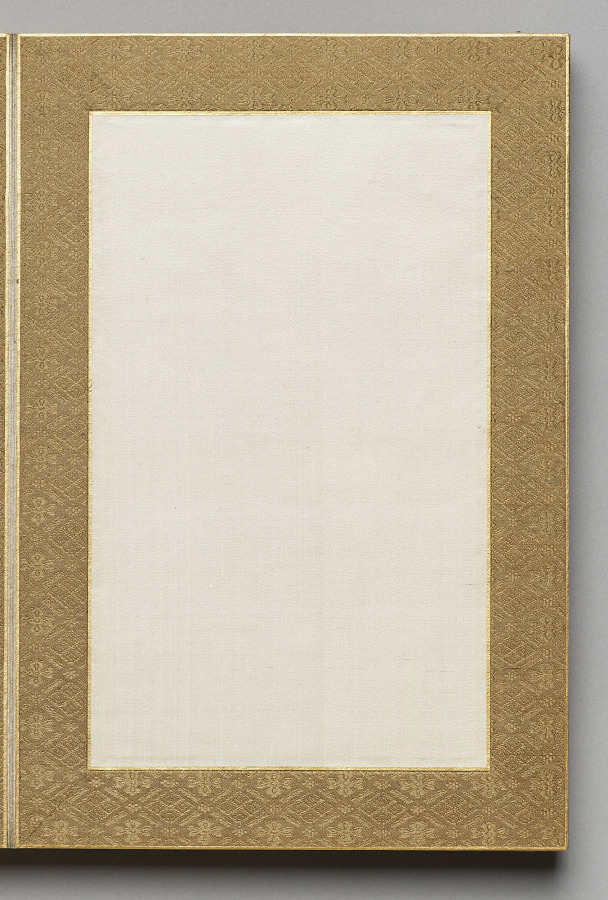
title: Painting from Flowers and Grasses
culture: Japan, Edo period (1615–1868)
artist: Tsubaki Chinzan (Japanese, 1801–1854)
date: 1841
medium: album; ink and color on silk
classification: Painting